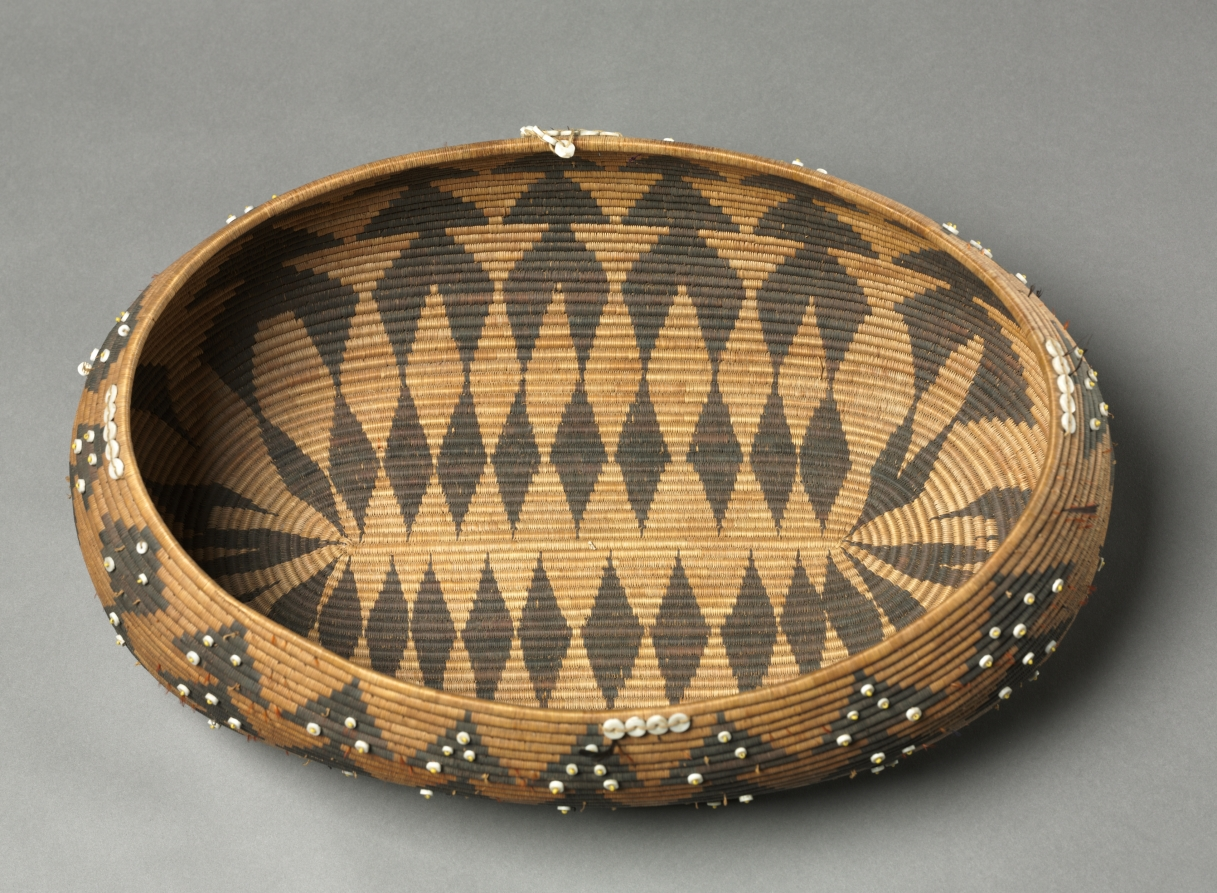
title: Doctor's Basket, Canoe- shaped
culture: California, Pomo, 19th century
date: 1890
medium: coiled, with shell and yellow glass beads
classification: Basketry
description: Oblong baskets like this one, which range in size from miniatures to examples more than four feet long, are sometimes said to have been used by native doctors to store medicines and paraphernalia such as rattles. This one, however, probably was made not for native use but for sale to a turn-of-the-century collector.